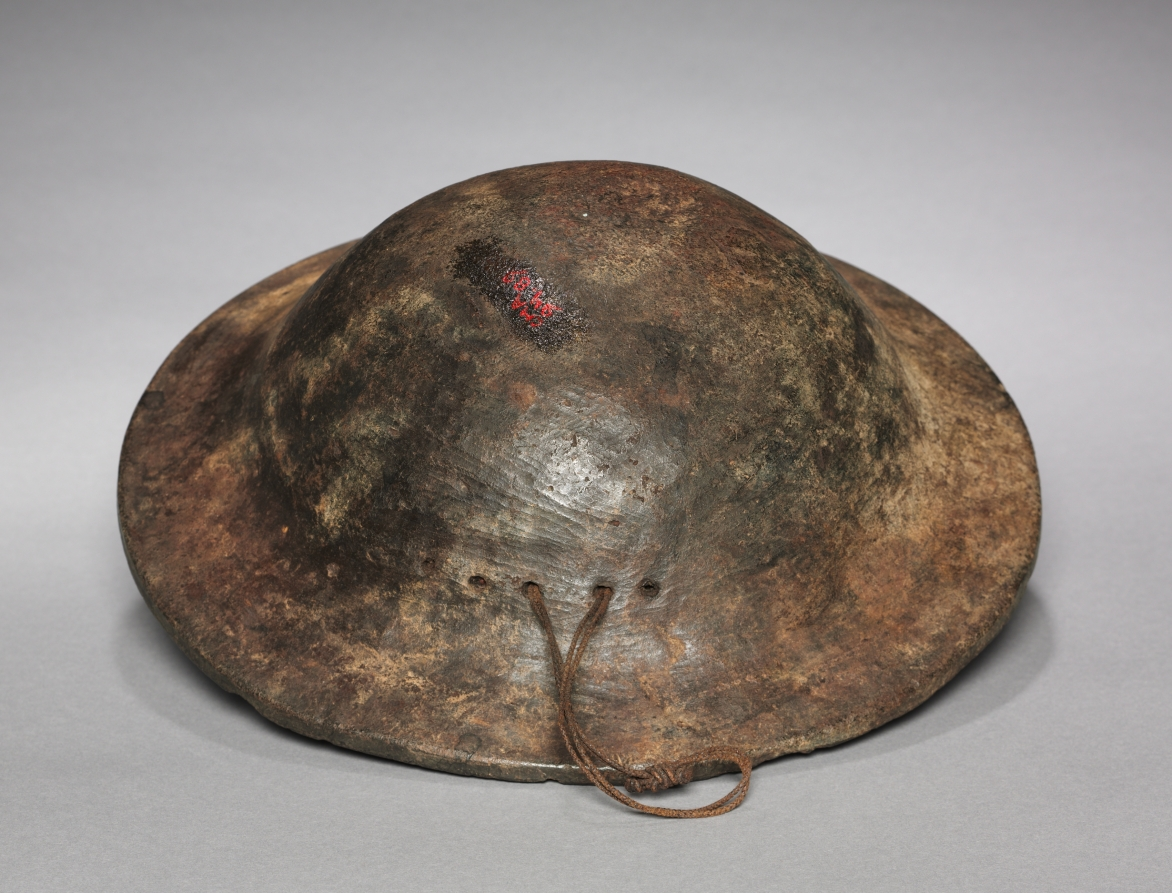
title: Bowl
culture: Africa, Central Africa, Democratic Republic of the Congo, Kuba-style maker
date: early 1900s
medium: Earthenware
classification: Vessels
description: This bowl probably once held cosmetics and was hung up when not in use. The Kuba are widely known for finely crafted luxury goods decorated with geometric, linear patterning. Although made of pottery, this bowl closely resembles carved wood. Visual puns of this sort, in which one kind of material is made to look like another, are much appreciated by the Kuba.